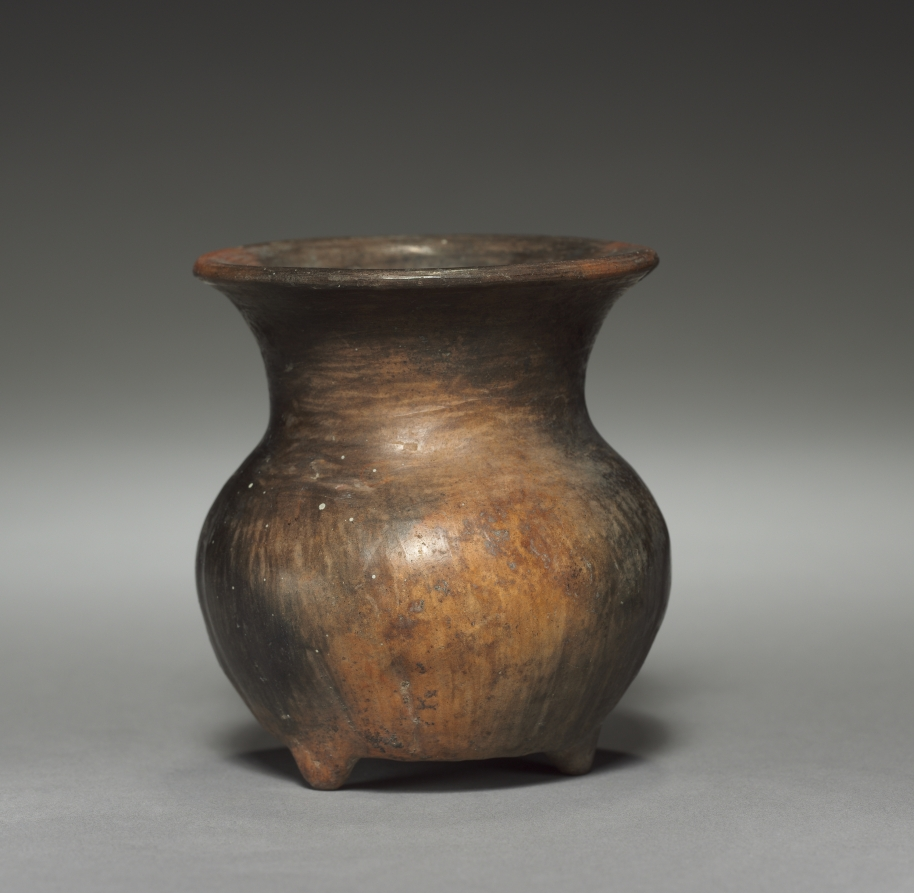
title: Vase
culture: Mexico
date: before 1521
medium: pottery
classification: Ceramic